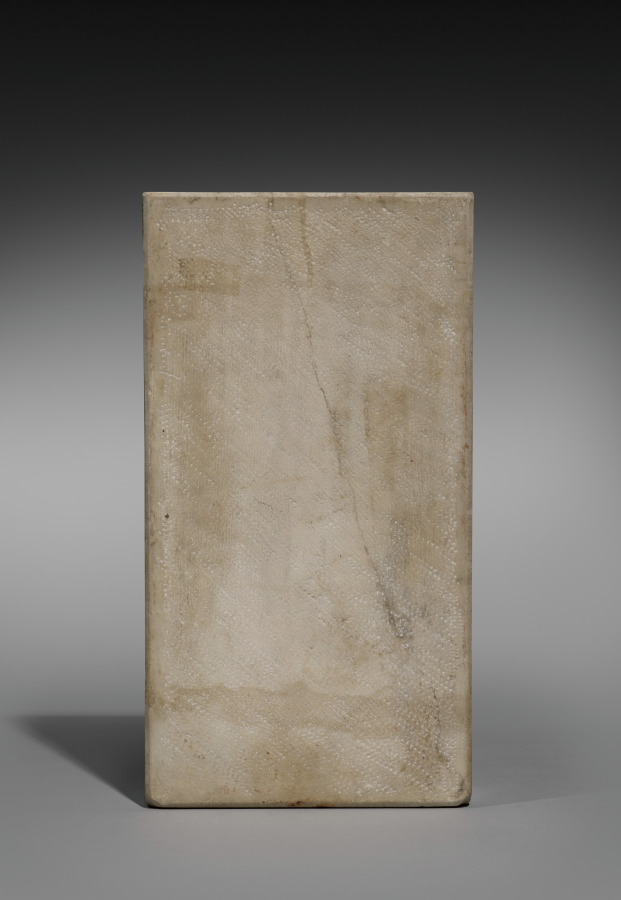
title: Dido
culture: Italy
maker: Aurelio Lombardo (Italian, 1501–1563)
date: c. 1525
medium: marble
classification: Sculpture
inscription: PVNICA SVM [DIDO ERE]XI QVAE MOENIA BYRSA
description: Artists customarily portrayed Dido as a forlorn lover abandoned by the Trojan hero, Aeneas, but here she is a conquering queen. Dido draws aside an oxhide curtain, a reference to the mythical founding of Carthage (in modern-day Tunisia, North Africa), when she was given an oxhide to demarcate granted land. By cutting it into thin strips she was able to encircle the future city. Dido was likely created for display in a studiolo, a place of study featuring refined works of art appreciated by humanist scholars and aficionados during the Renaissance.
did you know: Dido’s nudity and hairstyle are allusions to ancient Greek images of Aphrodite.